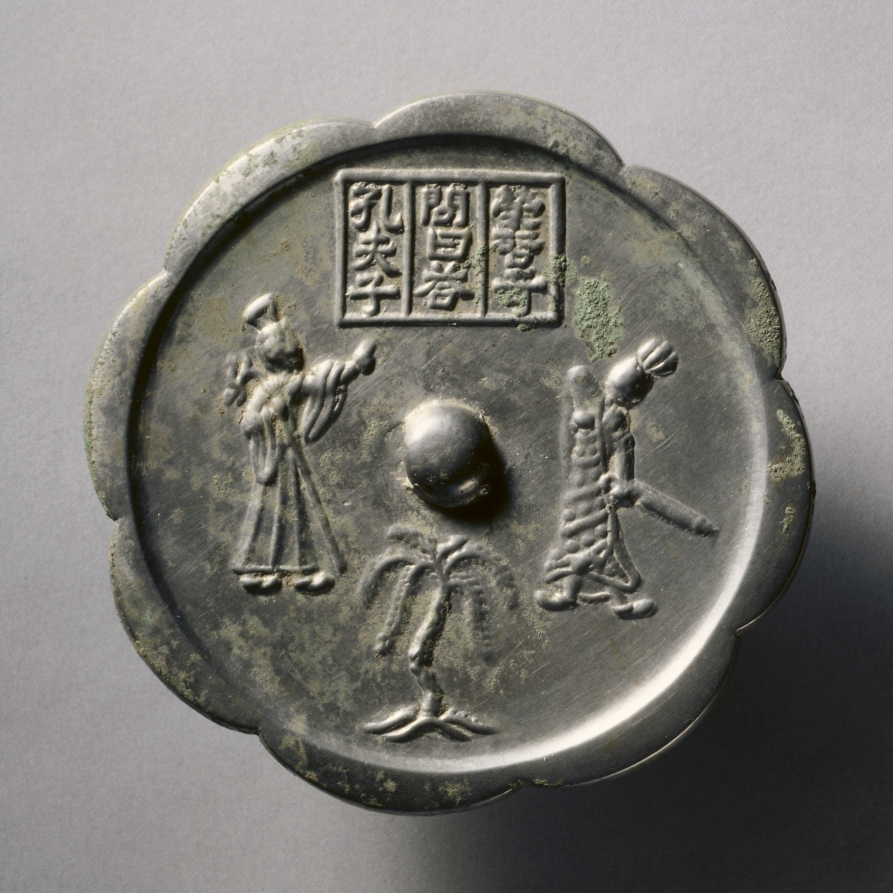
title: Lobed Mirror of Three Delights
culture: China, Tang dynasty (618-907)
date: 700s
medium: bronze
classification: Metalwork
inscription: 榮啟期問曰答孔夫子